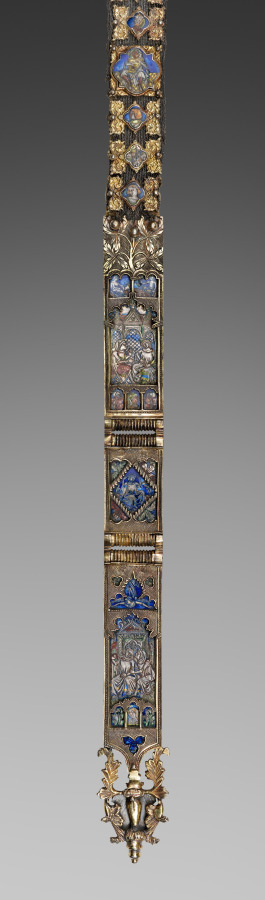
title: Belt for a Lady's Dress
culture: Italy, Siena(?)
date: c. 1375–1400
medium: basse-taille enamel and gilding on silver, silver thread, gilt-silver buckle, cast and chased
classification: Jewelry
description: Because of its extraordinary richness, this belt (also known as a girdle) was both an ornament for the body and an object of great personal luxury. Almost eight feet in length, belts like this were at the height of fashion for both men and women. After being passed around the waist and through the buckle, one end of the belt would fall to the hem of the garment. The belt's many colorful enamel plaques are worked in translucent enamel over decoration engraved into the silver beneath (an enameler's technique known as basse-taille). Within the plaques and cast into the buckle are scenes of courtly love, musicians, and fantastic animals. A large number of translucent enamels were made for secular objects during the late Middle Ages for use on jewelry, cups, garment clasps, and similar objects. This belt is a rare survival among these now scarce objects.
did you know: Look closely at the tiny scenes of courtly love on the plaques that adorn this belt. Given their size, these scenes were designed for the enjoyment of the woman who wore this belt over a sumptuous dress rather than an admirer from a distance.